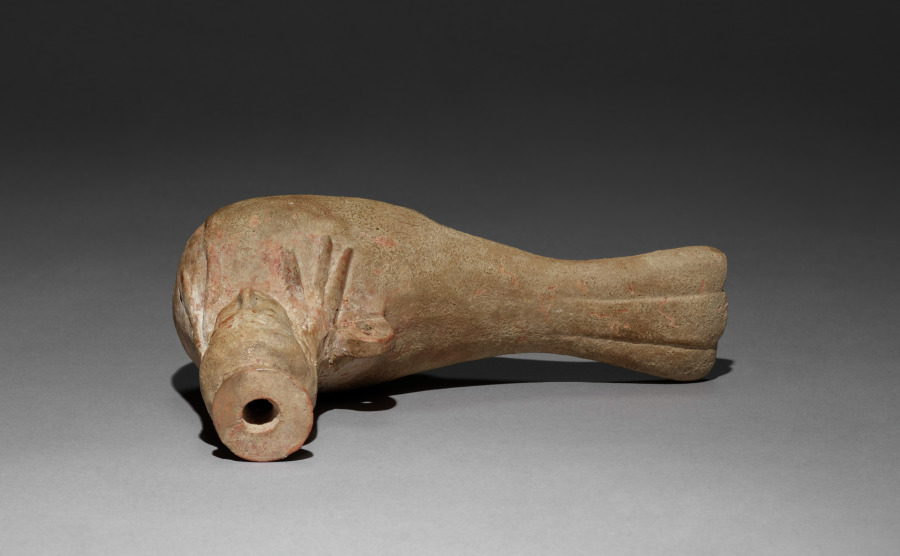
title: Siren-Shaped Perfume Flask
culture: Greece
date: 600–480 BCE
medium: terracotta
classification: Sculpture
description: A half-bird, half-woman creature, a siren lured sailors to death by the sweetness of her song. The most famous sirens appear in the ancient epic the Odyssey. Shaped like a siren, this vessel likely held valuable perfumed oil. Its small mouth limited spillage, and a string attached to the loops on its back allowed it to hand or hold a stopper.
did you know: In the Odyssey, Odysseus’s crew escapes the sirens by plugging their ears with wax.